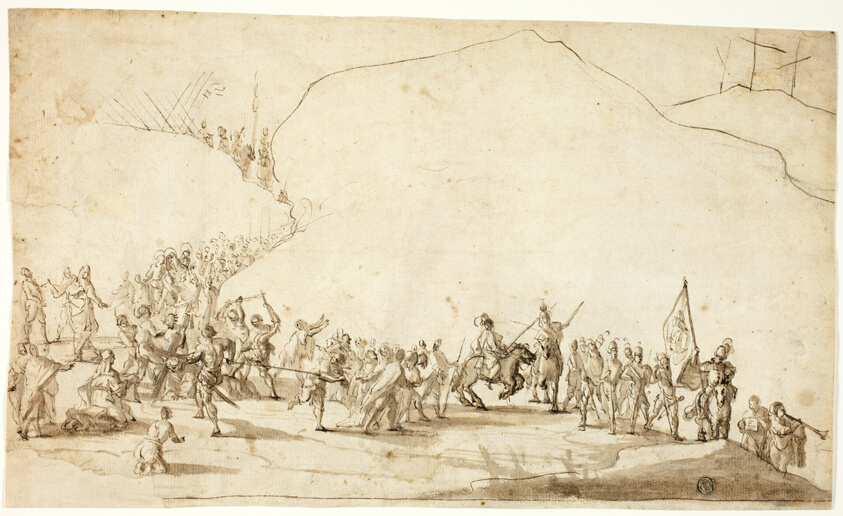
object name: Drawing and Watercolor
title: Calvary (recto); Sketch of Lower Part of Right Leg (verso)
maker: Unknown Artist; Italian, 17th century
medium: Pen and brown ink, with brush and brown wash, and traces of black chalk (recto), and red chalk (verso), on ivory laid paper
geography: Italy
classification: drawings (visual works); prints and drawing; chalk; paper; pen and ink drawings